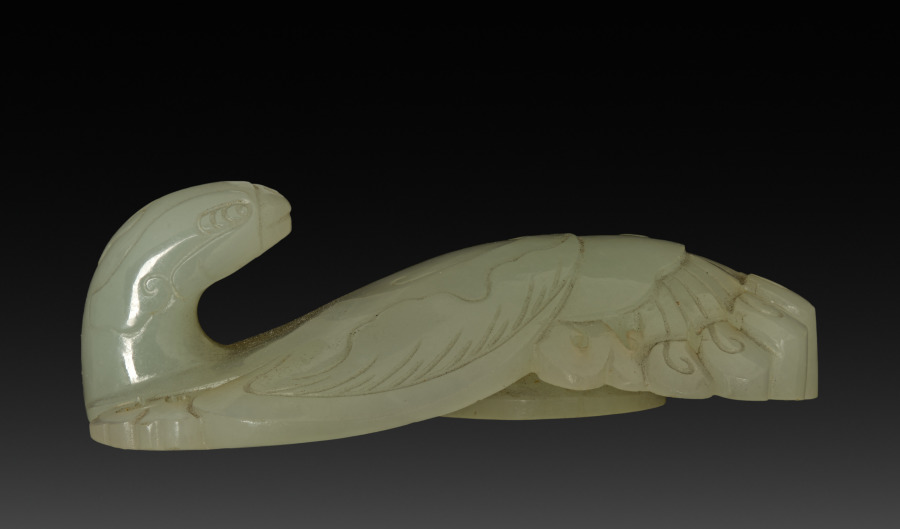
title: Buckle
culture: China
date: 1800s–1900s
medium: white jade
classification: Jewelry